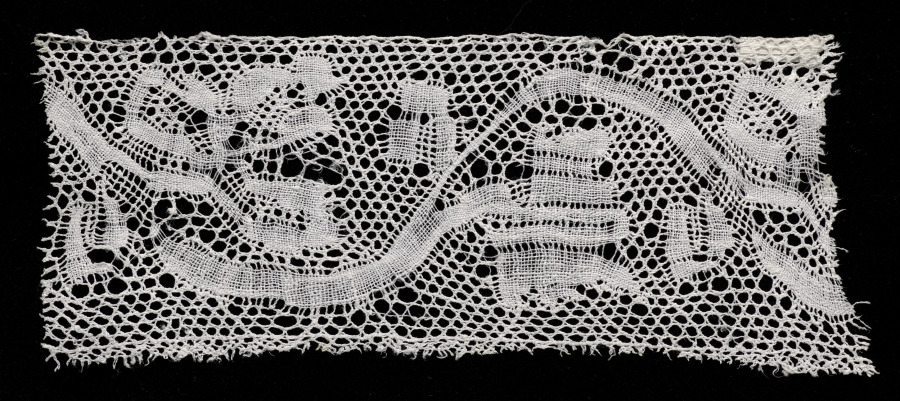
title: Lace Edging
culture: Spain, Terez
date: 1700s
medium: Bobbin lace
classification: Lace